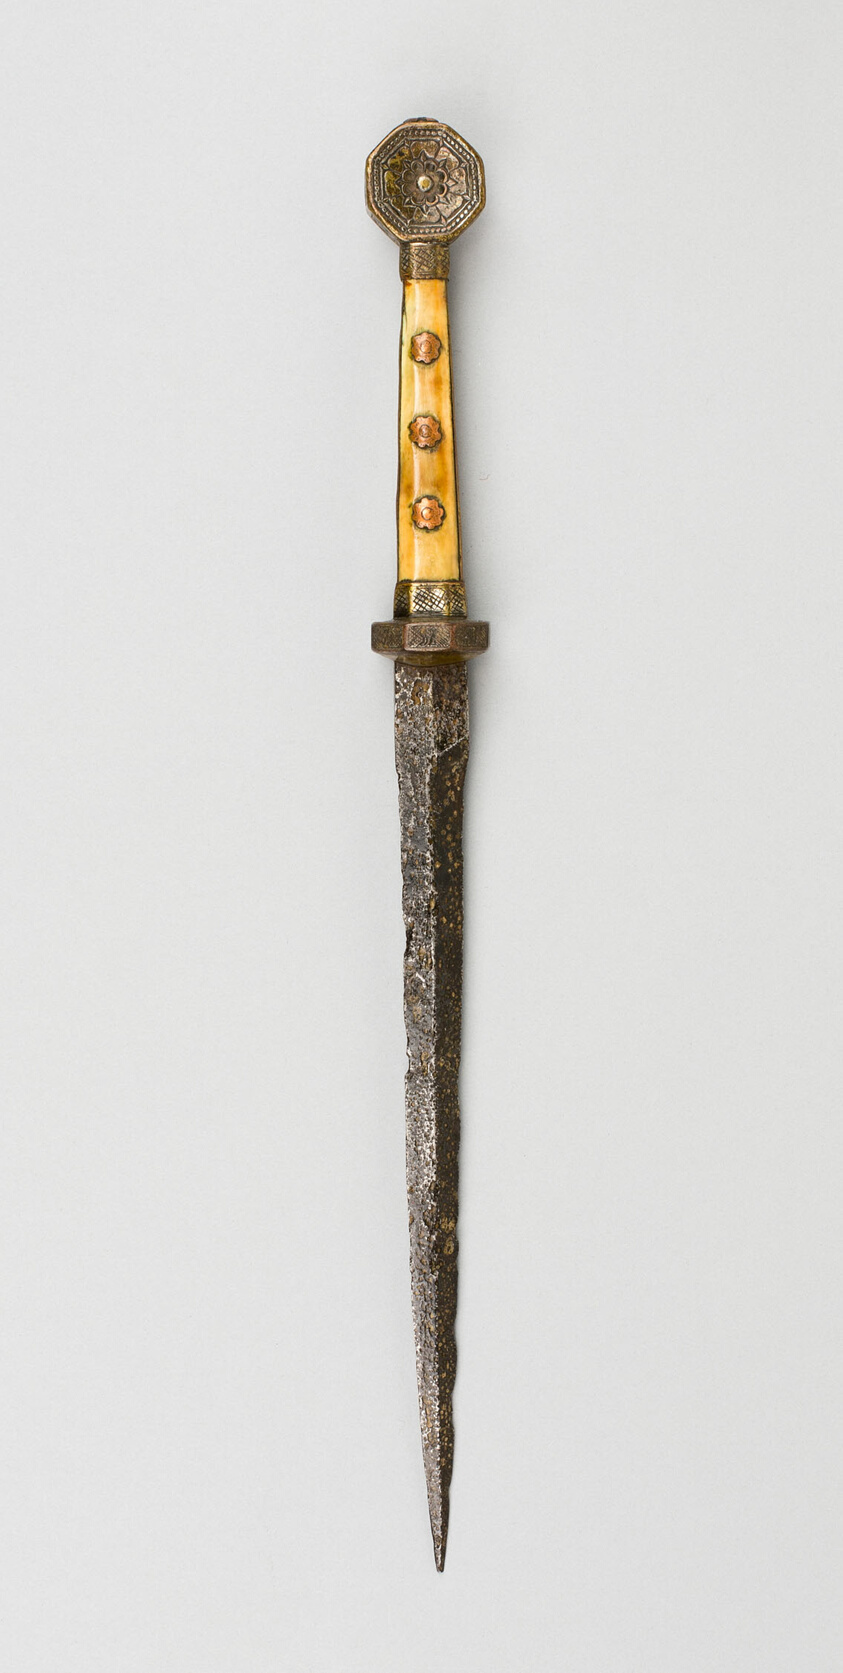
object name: Arms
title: Dagger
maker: European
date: 19th century in the 15th century style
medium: Steel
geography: Europe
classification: edged weapon-dagger; arms; arms and armor